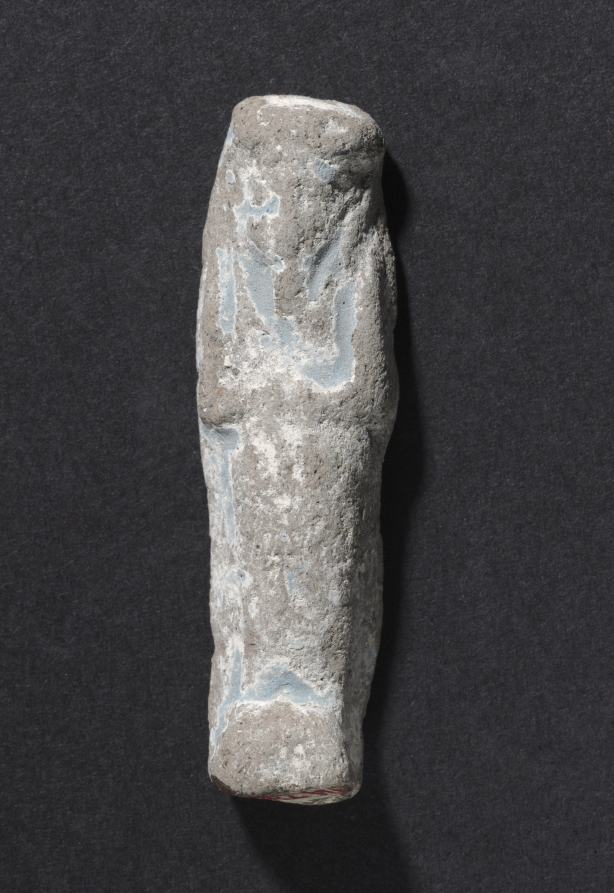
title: Shawabty of Ditamenpaankh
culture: Egypt, Late period (715–332 BCE), Dynasty 25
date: 715–656 BCE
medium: terracotta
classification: Funerary Equipment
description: High demand for shawabtys in the Late Period, a time when as many as 400 or more shawabtys were placed in the tomb with the deceased, gave rise to a specialized container for storing them: the shawabty box. This example is inscribed for the lady of the house, Ditamenpaankh, and was probably one of a pair originally made for her. The single-masted boat on the box's lid is perhaps an allusion to the pilgrimage of the deceased to the holy city of Abydos, the cult city of Osiris, king of the dead. The shawabtys inside are crude, mass-produced examples cast in an open mold. Made of terracotta, their blue paint imitates more costly shawabtys made of faience. As for the shawabty spell, it has been removed from its traditional location on the shawabty's front and relocated onto the sides of box, where it needed only to be written once, thus expediting production.